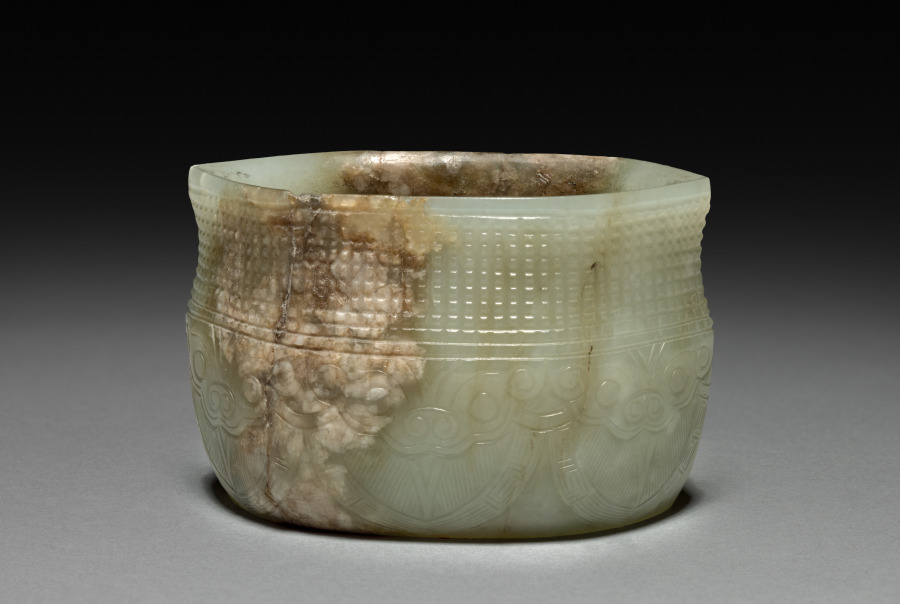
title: Cup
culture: China, Song dynasty (960-1279)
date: 960– 1279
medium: jade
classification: Jade